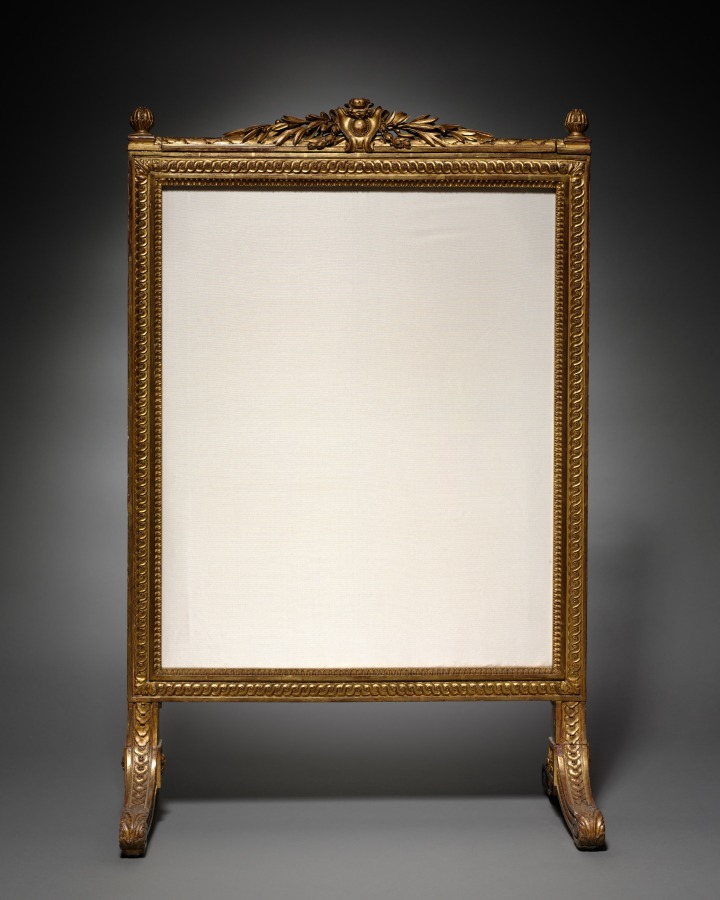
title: Fire Screen (Écran de Cheminée)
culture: France, Paris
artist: Georges Jacob (French, 1739–1814)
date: c. 1780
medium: gilt wood, upholstery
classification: Furniture and woodwork